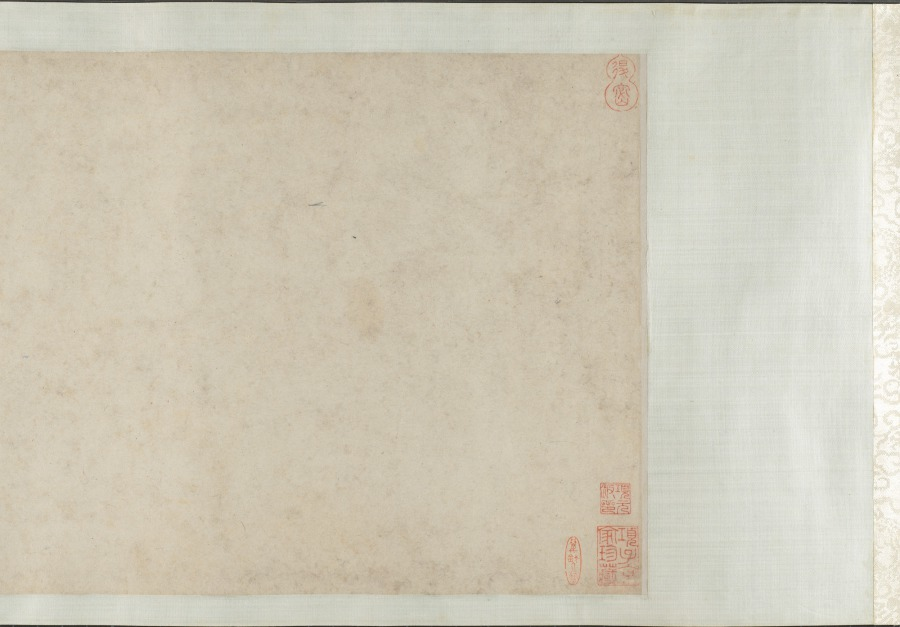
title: Garden for Solitary Enjoyment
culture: China, Ming dynasty (1368–1644)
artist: Qiu Ying (Chinese, 1494–1552)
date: 1515–52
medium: Handscroll; ink and light color on silk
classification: Painting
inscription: Accompanying text of an essay together with seven poems of Sima Guang (1019–1086) and one poem of Su Shi (1037–1101) written by Wen Zhengming (1470–1559) in 1558.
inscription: 2 colophons and 82 seals: 4 seals of Wen Zhengming 文徵明 (1470–1559); 59 seals of Xiang Yuanbian 項元汴 (1525–1590); 1 colophon, dated 1644, and 7 seals of Xiang Yukui 項禹揆 (c. late 1500s–1659); 1 colophon, dated 1880, and 2 seals of Weng Tonghe 翁同龢 (1830–1904); 2 seals of Ch'eng Chen-i (19th c.); 1 seal of Han Ch'ung (19th c.); 4 seals of Wan-go H. C. Weng 翁萬戈 (1918–2020); 3 seals unidentified.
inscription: Colophon by Xiang Yukui 項禹揆 (c. late 1500s–1659): The painting of The Garden for Self-enjoyment on the right by Shih-chou, Mr. Qiu [Qiu Ying] is in the style of Li Lung-mien. Its mood is peaceful, as if meeting the ancient gentlemen face to face among the brushes and silk; it lifts one above the sordid bustle of life. Formerly, my late father handed me this scroll which had only the painting without the written essay. I considered asking a good calligrapher to write the essay to add to it but was afraid that the quality of the writing would not match the painting. Several years later, I saw at a friend's house this essay and poems (of Ssu-ma Kuang] written by Hengshan [Wen Zhengming], once owned by my grandfather; so I spared no expense to obtain it. I rejoiced at this and said: "The divine swords are finally united. How things are pre-destined!" Now my friend Chang Kung-chao's technique for mounting [painting and calligraphy] is excellent. Therefore by daring to take them out and join them together, I can preserve this beautiful story of singular reunion. Xiang Yukui recorded at Hai-yeh-t'ang [hall] two days before New Year's Eve in the jiasheng year of the Chongzhen era [1644]. trans. LYSL/HK/WKH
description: Garden of Solitary Enjoyment refers to a site built in 1073 by the statesman Sima Guang (1019–1086) after he had retired to Luoyang, Henan province. Every spring, visitors would flock to his garden. Each of its seven structures references a historic figure. Sima wrote: I channel streams [like Du Mu], to water flowers [like Bai Juyi], or trim bamboo [like Wang Huizhi]. . . . I know of no joy between heaven and earth that could take its place. Qiu Ying’s painting, created after an 11th-century version of the same theme, must have appealed to garden owners of the Ming dynasty, since it became the template for numerous Suzhou workshop copies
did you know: Sima Guang completed his monumental survey of Chinese history, Zizhi tongjian, in the garden depicted in this painting.